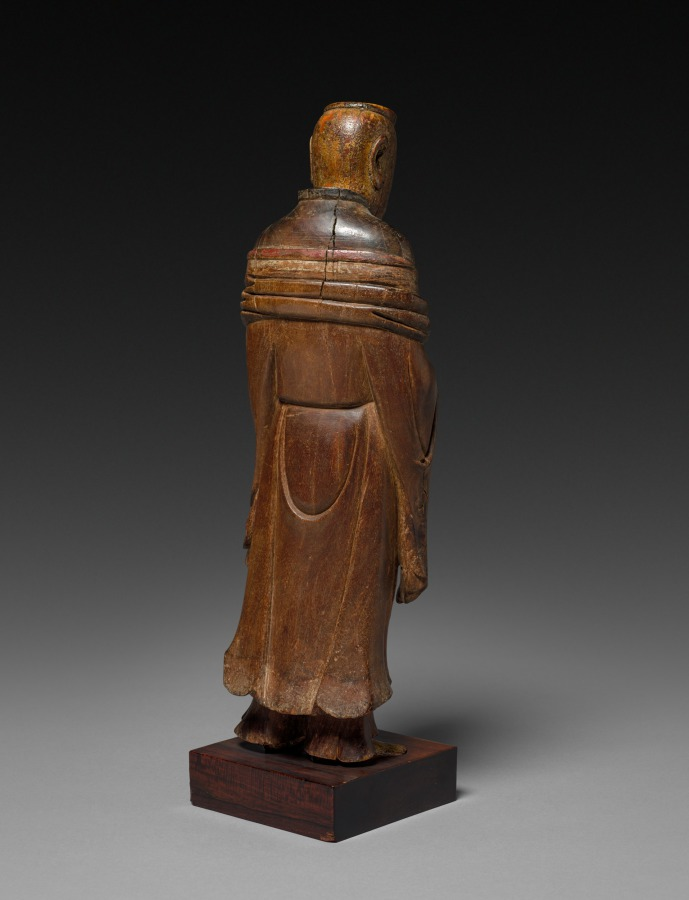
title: Daoist Figure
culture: China, Southern Song dynasty (1127-1279)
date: 1200s-1300s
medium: wood and ivory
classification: Sculpture